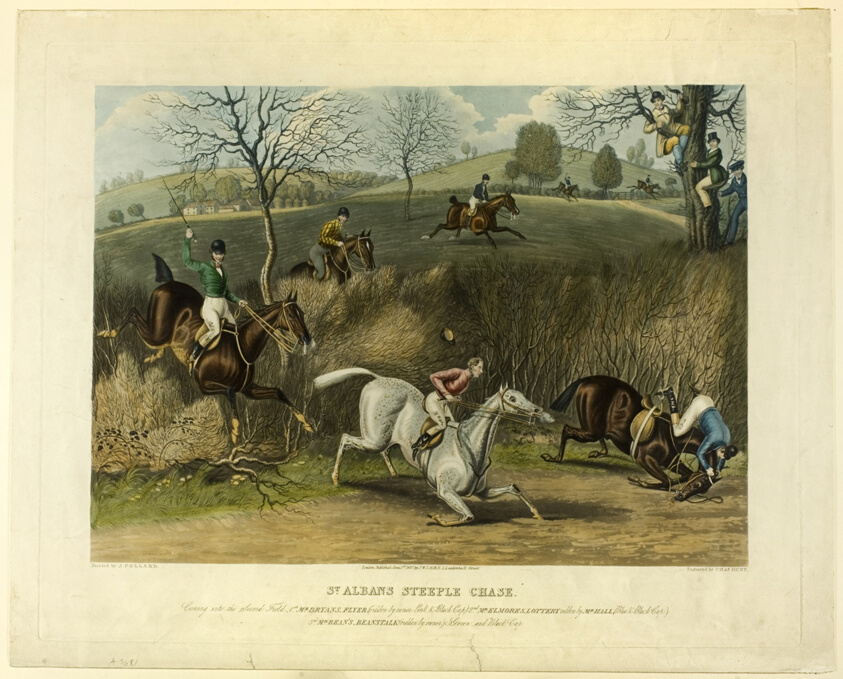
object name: Print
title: Saint Albans Steeplechase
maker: Charles Hunt (English, 1803-1877); after James Pollard (English, 1797-1867)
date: 1837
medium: Aquatint on paper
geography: England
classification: aquatint; print; prints and drawing